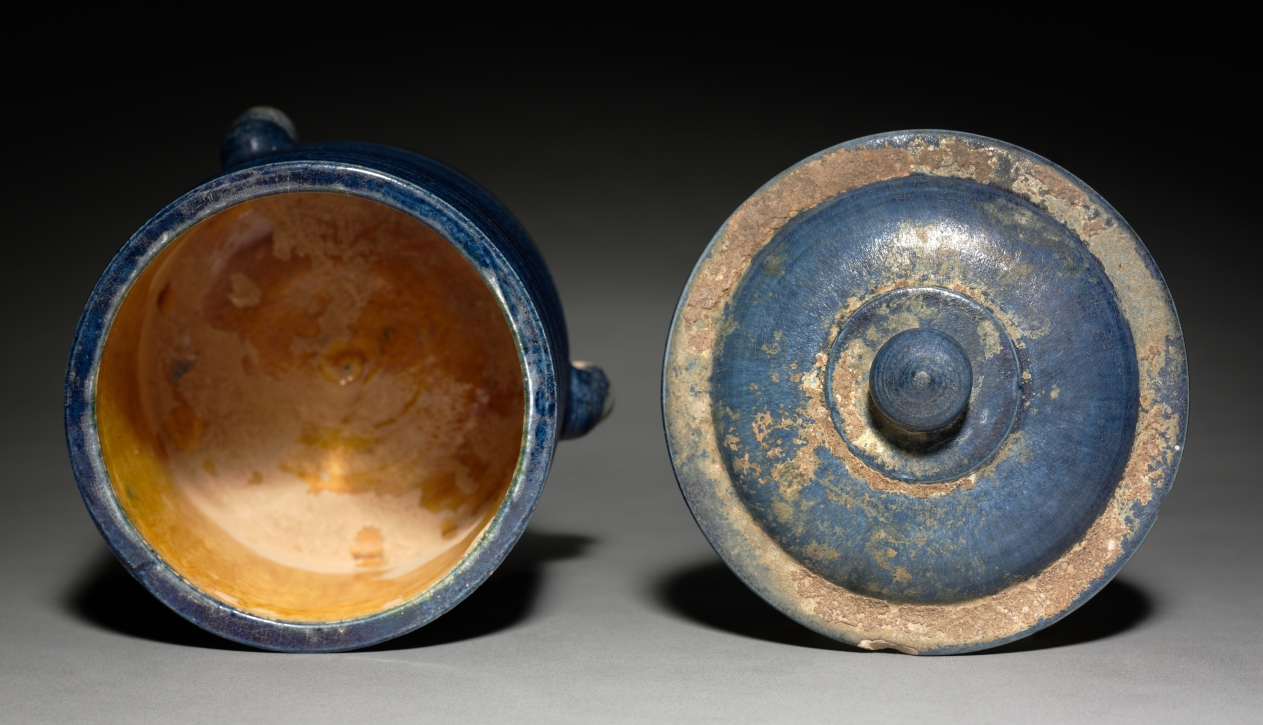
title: Covered Jar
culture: China, Tang dynasty (618–907)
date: early 700s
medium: glazed earthenware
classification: Ceramic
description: This covered cylindrical jar with three animal feet is lavishly covered with a cobalt blue glaze in the exterior and an amber glaze in the interior. Of the colored lead glazes of sancai (three-color) ware, blue was preeminent and precious. Imported cobalt from Persia (Iran, Afghanistan) was used as a glaze colorant that yields a rich, brilliant blue of considerable splendor.